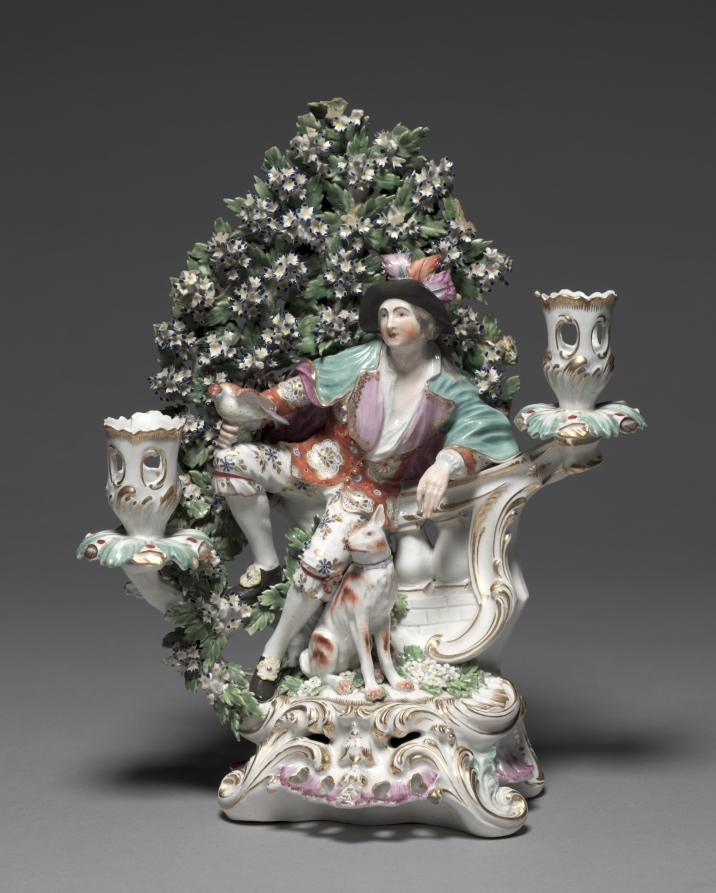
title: Candelabrum Depicting an Allegorical Figure of Liberty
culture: England, London, Chelsea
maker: Derby Porcelain Factory (Chelsea-Derby Period, 1770–84)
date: c. 1775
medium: soft-paste porcelain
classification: Ceramic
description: This allegorical figure depicts a shepherd dressed in richly patterned garments. Here the figure (Liberty) is accompanied by a dog and a bird that perches on his outstretched arm. An accompanying figure, a shepherdess (Matrimony) holds a birdcage in one hand and subtly directs the viewer’s gaze toward the sheep resting nearby with the other.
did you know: The canopy of foliage surrounding these figures was inspired by the arbors popular in theatrical stage designs during the mid-1700s.